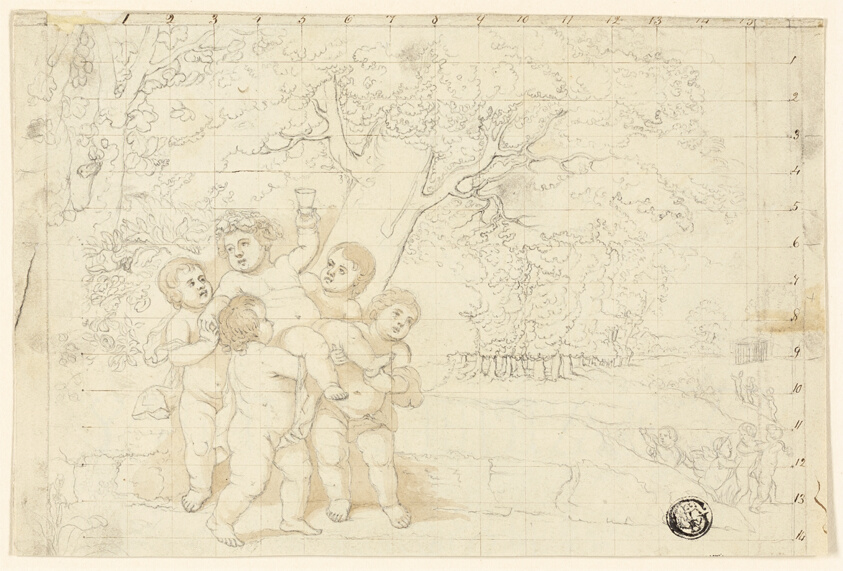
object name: Drawing and Watercolor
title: Putti Carrying Young Bacchus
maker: Unknown Artist; Eurpean, n.d.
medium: Graphite with brush and brown wash, squared in brown ink, on ivory wove paper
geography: England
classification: graphite; pen and ink drawings; drawings (visual works); prints and drawing